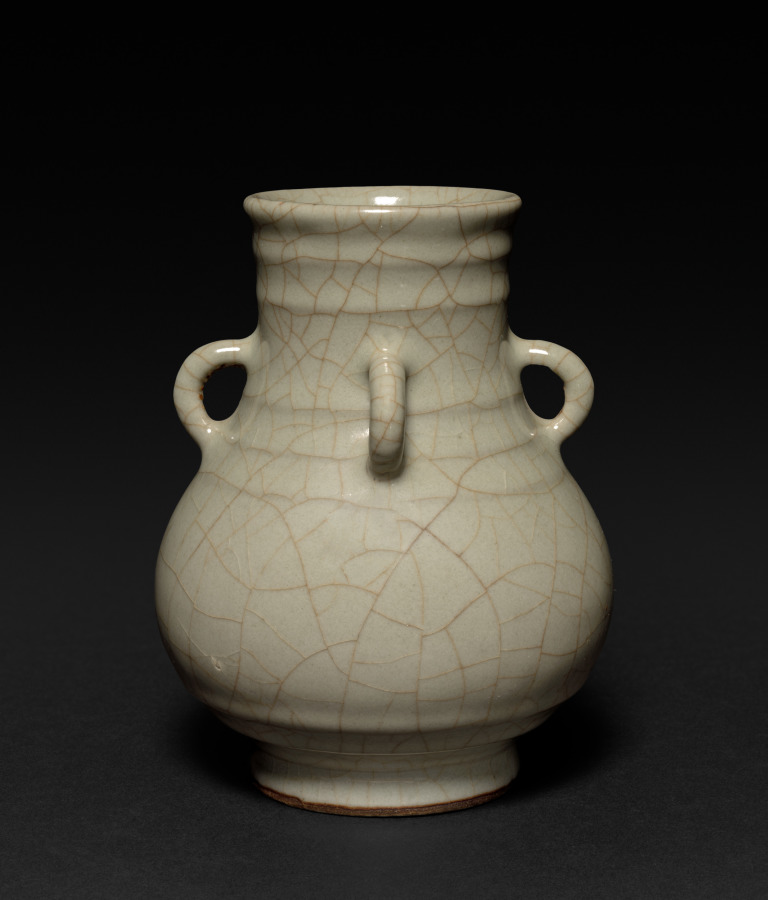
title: Vase: Guan type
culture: China, Qing dynasty (1644-1911)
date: 1700s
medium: porcelain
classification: Ceramic